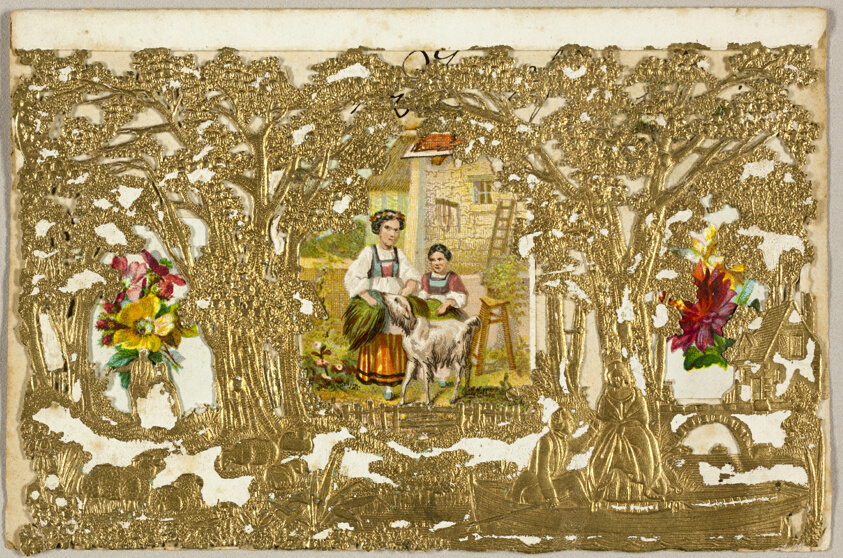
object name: Drawing and Watercolor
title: Untitled Valentine (Country Girls with Dog)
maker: John Windsor (English, 19th century)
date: c. 1873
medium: Gold paint with collaged elements on cut and embossed (designed) ivory wove paper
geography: England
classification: collage; valentine; prints and drawing; paper